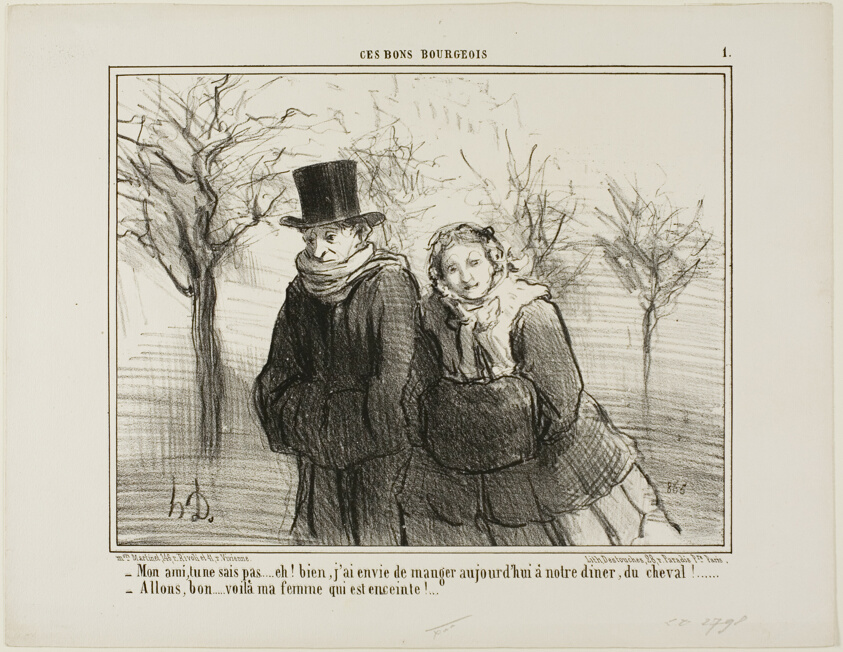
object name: Print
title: “- You know my dear, you'll never believe this, but I think I would love to have some horse-meat for dinner tonight! - There we go.... my wife must be pregnant!,” plate 1 from Ces Bons Bourgeois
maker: Honoré Victorin Daumier; French, 1808-1879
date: 1856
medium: Lithograph in black on white wove paper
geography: France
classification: lithograph; print; prints and drawing